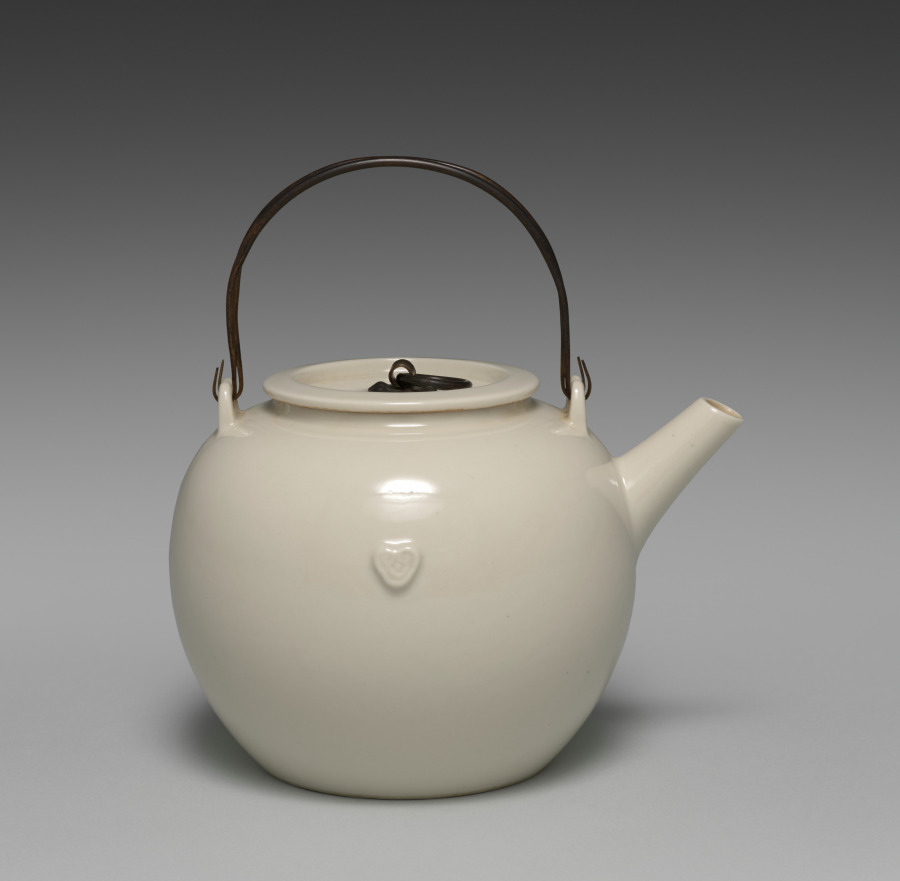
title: Teapot with Ruyi Motifs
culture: Japan, Meiji period (1868–1912)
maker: Seifū Yohei III (Japanese, 1851–1914)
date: 1893–1914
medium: Porcelain with molded design and iron handles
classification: Ceramic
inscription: The base of the pot has a “Seifu” seal.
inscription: Inscription on the box dated to 1960.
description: The simple, round form of this teapot is embellished with only a pair of nyoi staff-head motifs, one on each side. Two arched iron handles, parallel to each other, are hooked through holes in raised tabs at the front and back of the shoulders of the pot. The round lid is depressed so that an iron ring handle fastened with an iron clamp passing through the lid can lie flat inside the recessed area. The box is not original to the piece and has an inscription dated to 1960. The person who wrote it clearly admired Yohei III and his efforts to produce works that resembled Chinese ceramics. The inscription describes Yohei’s journey to perfecting these copies but misidentified the Chinese kiln whose wares were the basis for this particular work.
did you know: The base of the pot has a “Seifu” seal.